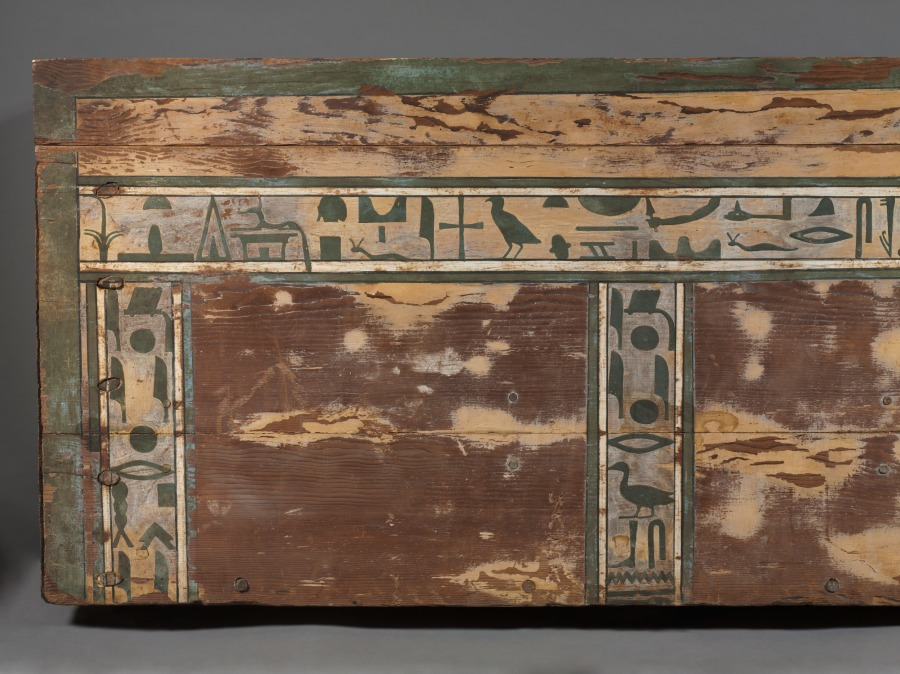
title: Coffin of Senbi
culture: Egypt, Meir, Middle Kingdom, mid-Dynasty 12, reign of Amenemhat II to Sesostris III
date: c. 1918–1859 BCE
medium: gessoed and painted cedar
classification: Funerary Equipment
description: The most common type of coffin during the Middle Kingdom took the shape of a rectangular box with lid. The mummy inside was placed on his left side, facing east, his head behind the two magical eyes. These—in the shape of human eyes, to which have been added the markings of a falcon's head—were supposed to enable him to behold the rising sun, reborn daily. The long horizontal inscriptions are prayers to Anubis (god of embalming) and Osiris (god of the dead) for offerings of food and drink and other items necessary for survival in the afterlife. The short vertical inscriptions place him under the protection of the gods of earth, sky, air, and moisture, as well as various funerary deities.